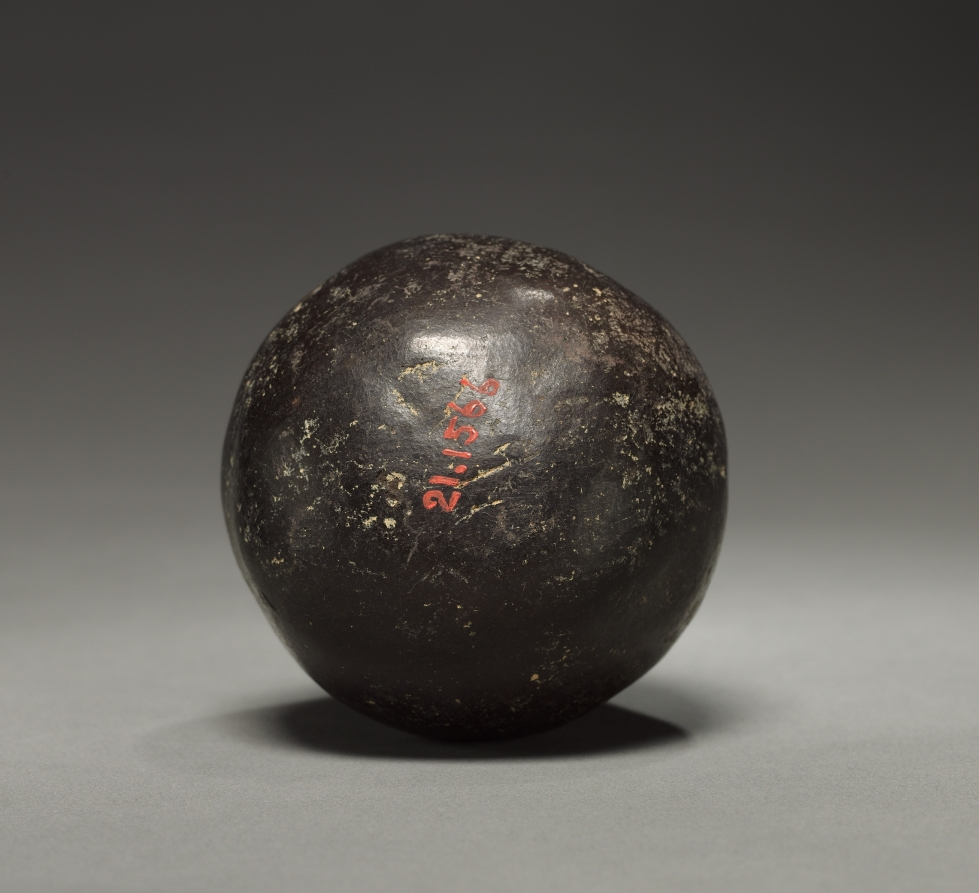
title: Fruit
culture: Colombia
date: before 1921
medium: pottery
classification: Ceramic